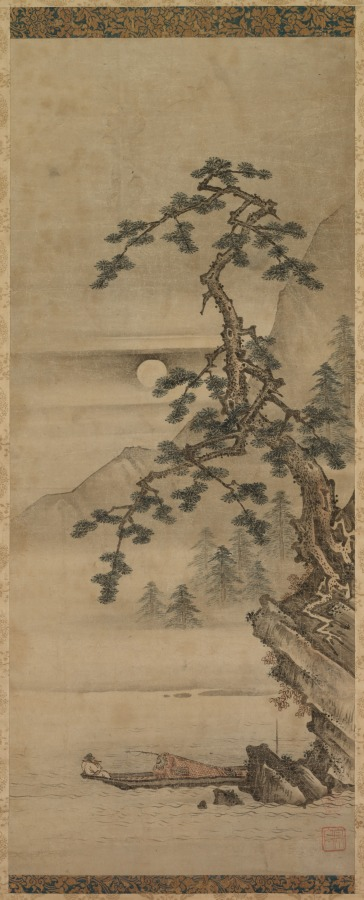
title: Playing Flute in Moonlight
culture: Japan, Muromachi period (1392–1573)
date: 1392–1573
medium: hanging scroll; ink on paper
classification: Painting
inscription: Sealed: 小栗, 宗丹